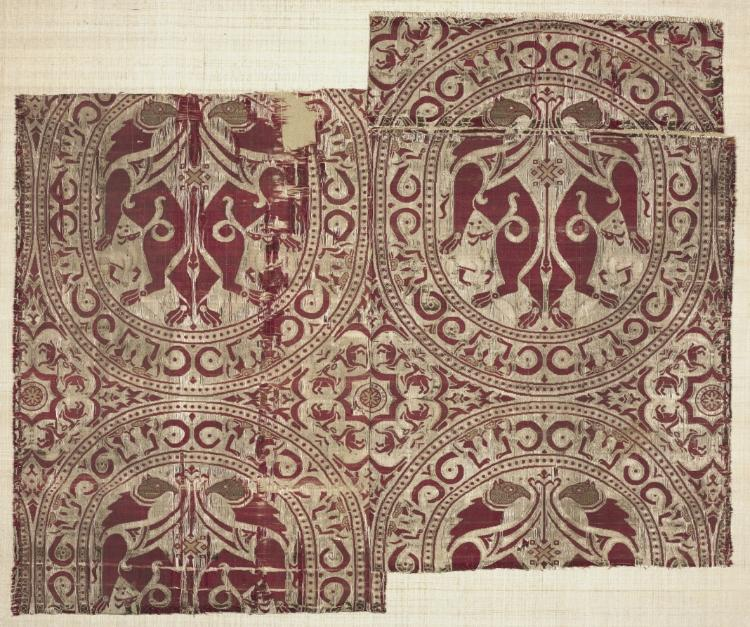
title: Lampas with griffins in roundels, from the Reliquary of Saint Librada in Siguenza Cathedral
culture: Spain, Almeria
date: 1100–50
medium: Silk and gold thread: lampas and plain-weave variant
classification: Textile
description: Mirrored griffins with gold heads dominate these roundels, as they turn their heads unnaturally to stare at each other across their wing tips. The pairs of dragons in the framing border, however, have lost their artistic impact since the green silk thread has disintegrated into brown specks. Luxury silks woven in Islamic Spain were worn by Christian kings throughout Europe. Their patterns also influenced designs in Jewish synagogues and were the standard aesthetic of the elaborately decorated walls in the Muslim Alhambra palace in Granada. This silk is from the reliquary of Saint Librada in Siguenza Cathedral, northeast of Madrid.